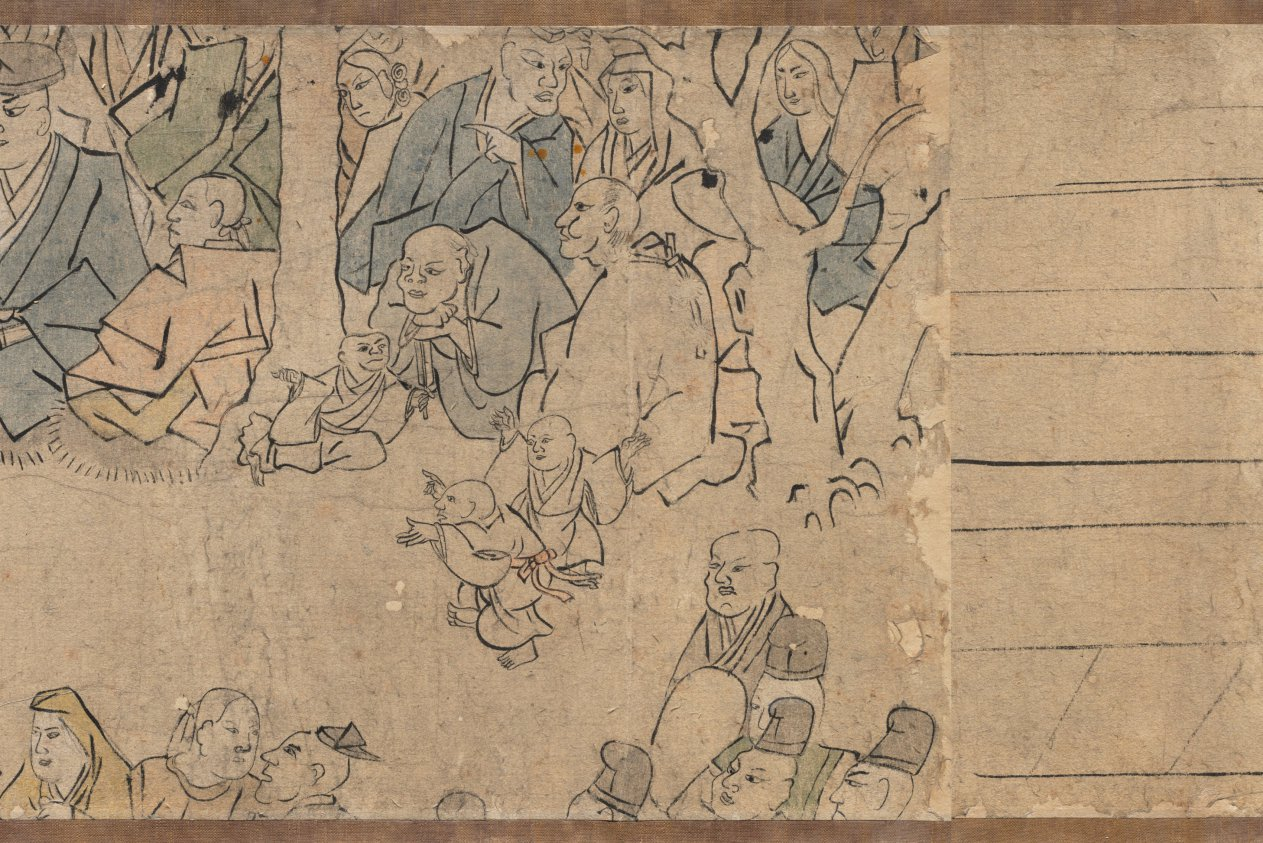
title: Oeyama Engi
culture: Japan, Edo period (1615–1868)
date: 1615–1868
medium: one of a pair of handscrolls; ink and color on paper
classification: Painting